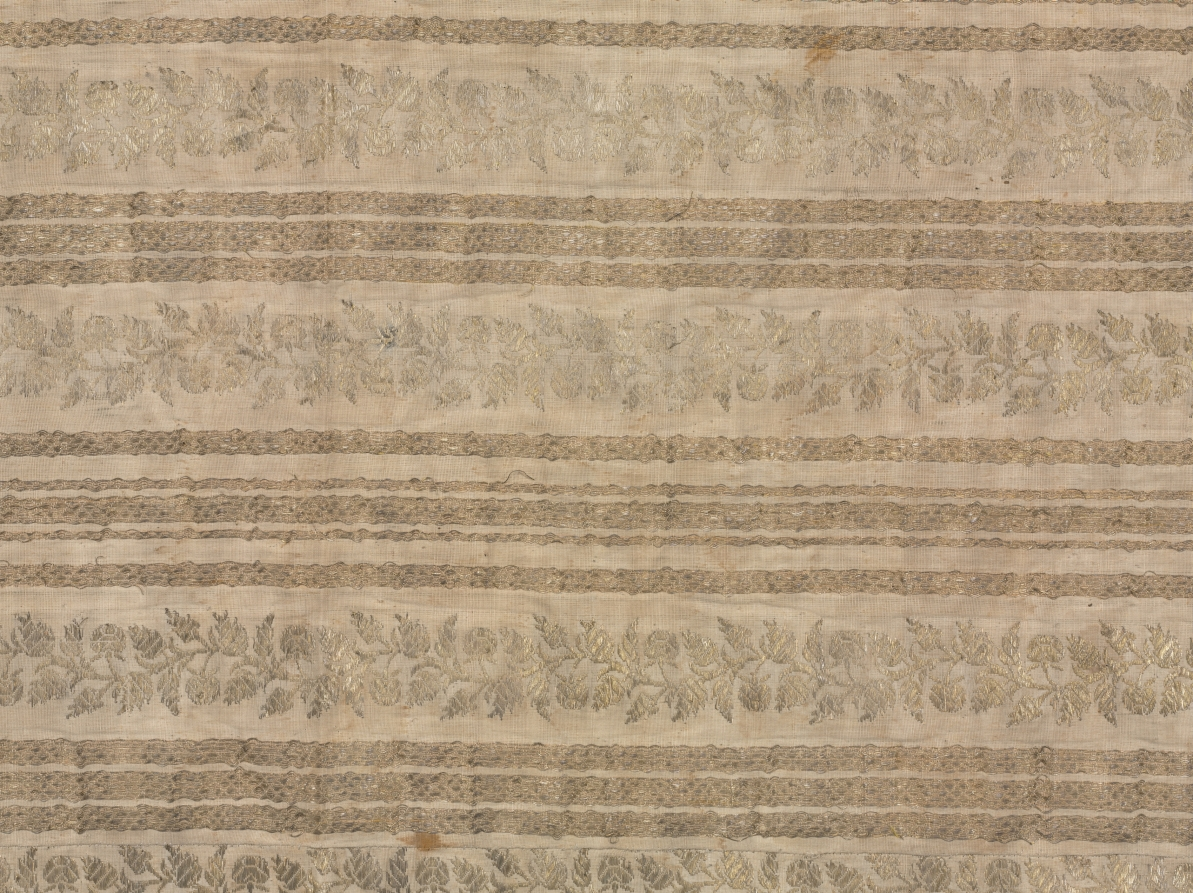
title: Fragment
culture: Iran, 19th century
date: 1800s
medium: brocade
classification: Textile